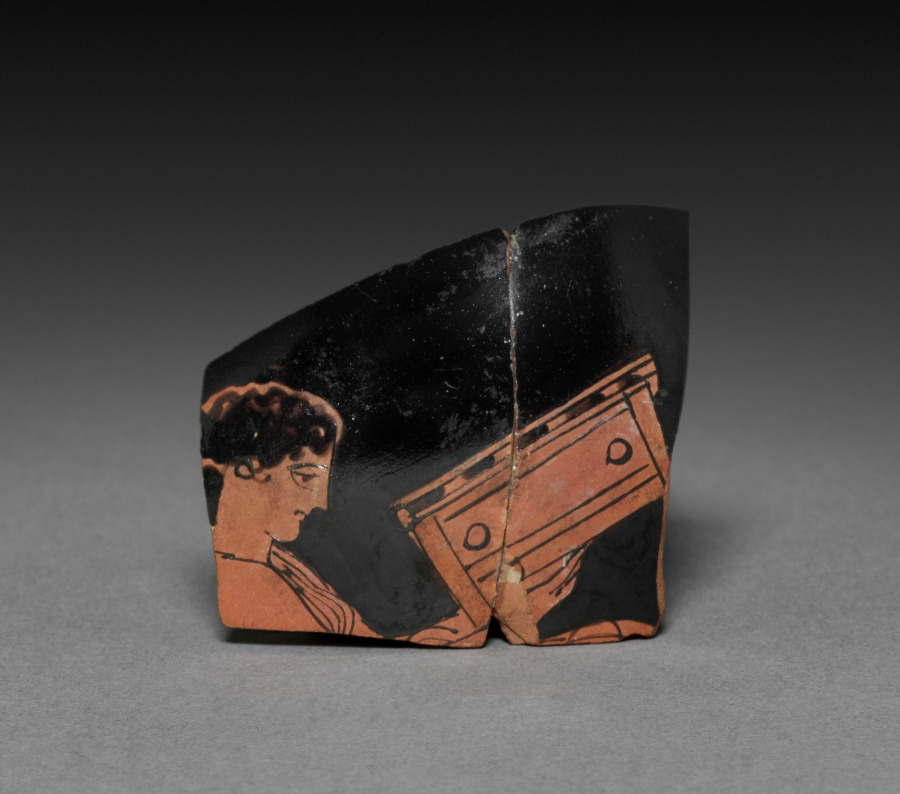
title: Fragment from Red-Figure Oinochoe (Wine Jug) or Hydria (Water Jar): Woman Holding Box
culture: Greek, Attic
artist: attributed to Shuvalov Painter (Greek, Attic, active c. 440–410 BCE)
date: c. 425–420 BCE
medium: ceramic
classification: Ceramic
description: The relatively large eyes and head of this seated woman are characteristic of figures painted by the Shuvalov Painter, a painter known to have painted numerous small vases during the mid- to late fifth century BC. Along with many mythological subjects, the Shuvalov Painter often showed women in domestic settings, as here; the box or chest she holds could be a bridal gift.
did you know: The Shuvalov Painter is named after the former owner of an amphora now in the Hermitage.